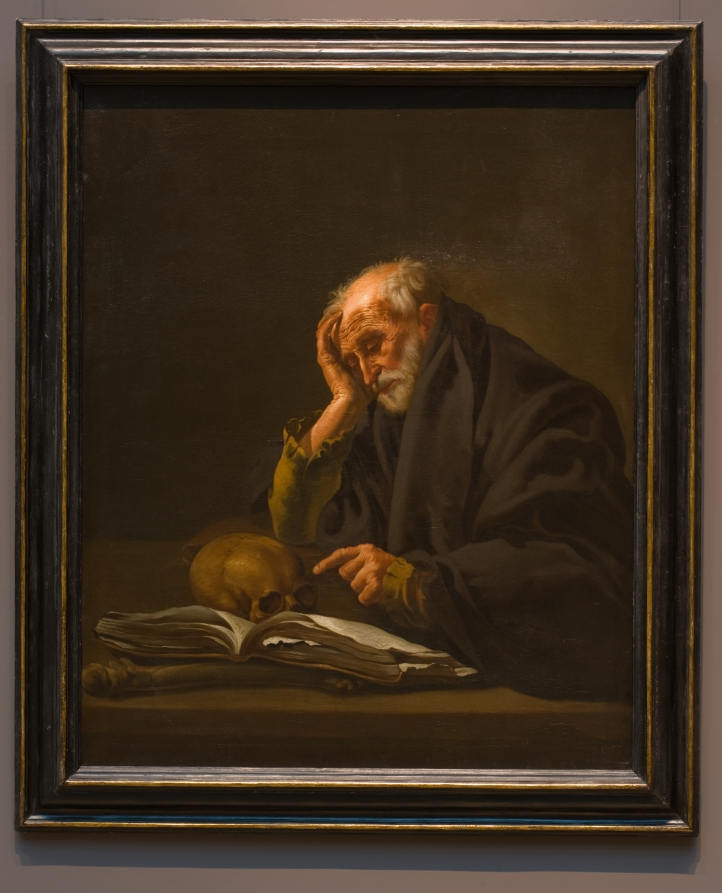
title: Saint Jerome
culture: Flanders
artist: Hendrick ter Brugghen (Dutch, 1588–1629)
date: c. 1621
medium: oil on canvas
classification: Painting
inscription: Signed and dated upside down on open book: "H TBrugghen 1621"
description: Not all subjects are easy to identify. This museum long thought that the subject was the Greek philosopher Heraclitus, largely because tears are part of the standard representation of this ancient thinker. However, ter Brugghen omits the other crucial key to identifying Heraclitus--a globe over which he weeps. Instead, the book and skull indicate that the figure is Saint Jerome, known for translating the Bible into Latin. The artist probably chose to show Jerome crying to intensify his penitence.